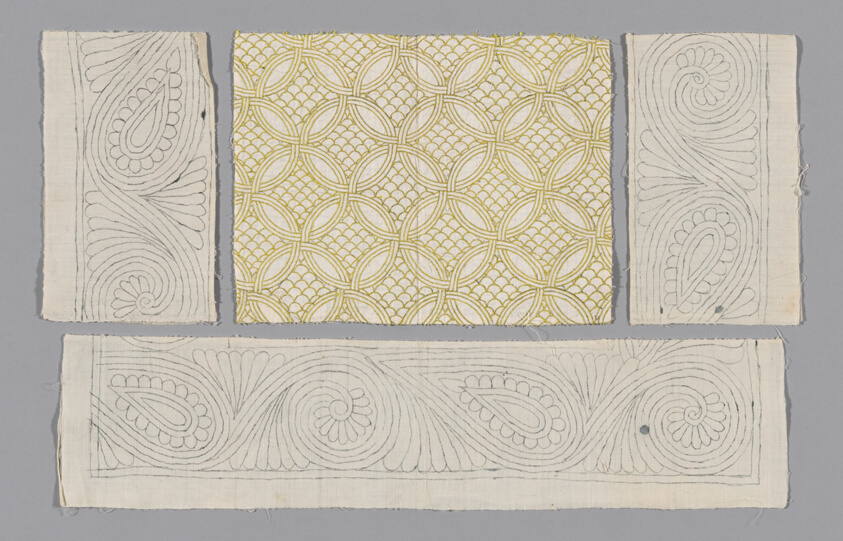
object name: Textile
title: Pillow Sham (Unfinished)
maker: Made by the great-great grandmother, Jane Bolas Vaughan, or great-great-great grandmother, Elizabeth Ottiwell Vaughan, of Edward Goldisborough Chambre Vaughan, 1834–1914; England, Shropshire, Lobbington, Ellesmere, Burlton Hall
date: late 17th/early 18th century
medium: Linen, plain weave; underlaid with cotton, plain weave; embroidered with silk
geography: Southern England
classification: textile; needlework (visual works)